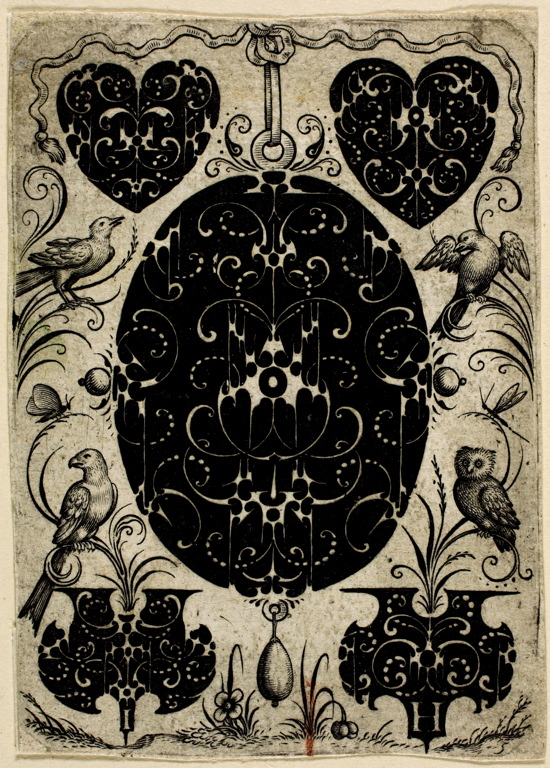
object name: Print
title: Ornamental Plate V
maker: Jacques Hurtu (French, flourished 1614-19-died before 1623)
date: c. 1619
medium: Engraving on paper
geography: France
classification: engraving; print; prints and drawing